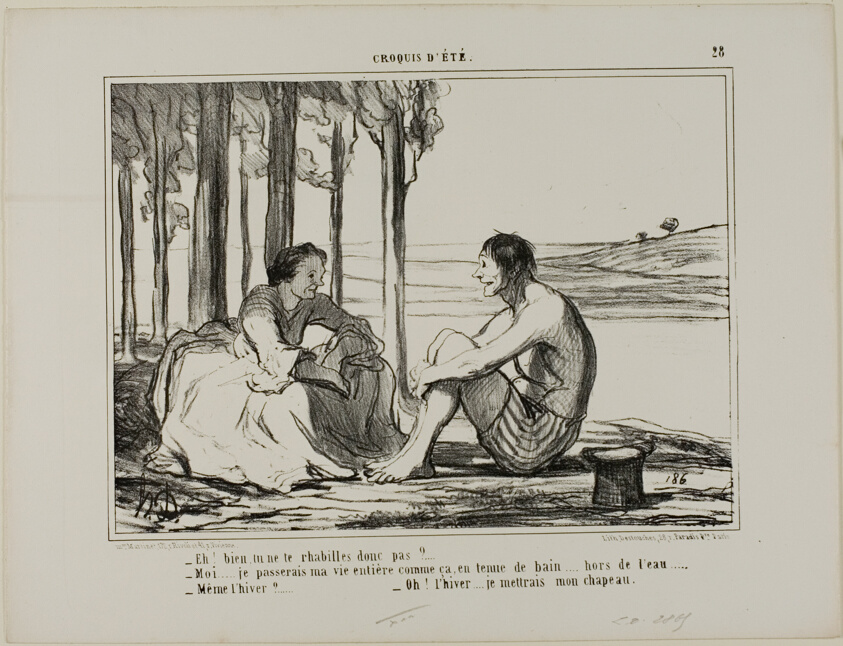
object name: Print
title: “- Aren't you getting dressed? - No... I remain like this in my swimming gear all day long, outside the swimming pool. - Even in winter? - Then I put on my hat!,” plate 28 from Croquis D'été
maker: Honoré Victorin Daumier; French, 1808-1879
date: 1858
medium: Lithograph in black on off-white wove paper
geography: France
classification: lithograph; print; prints and drawing